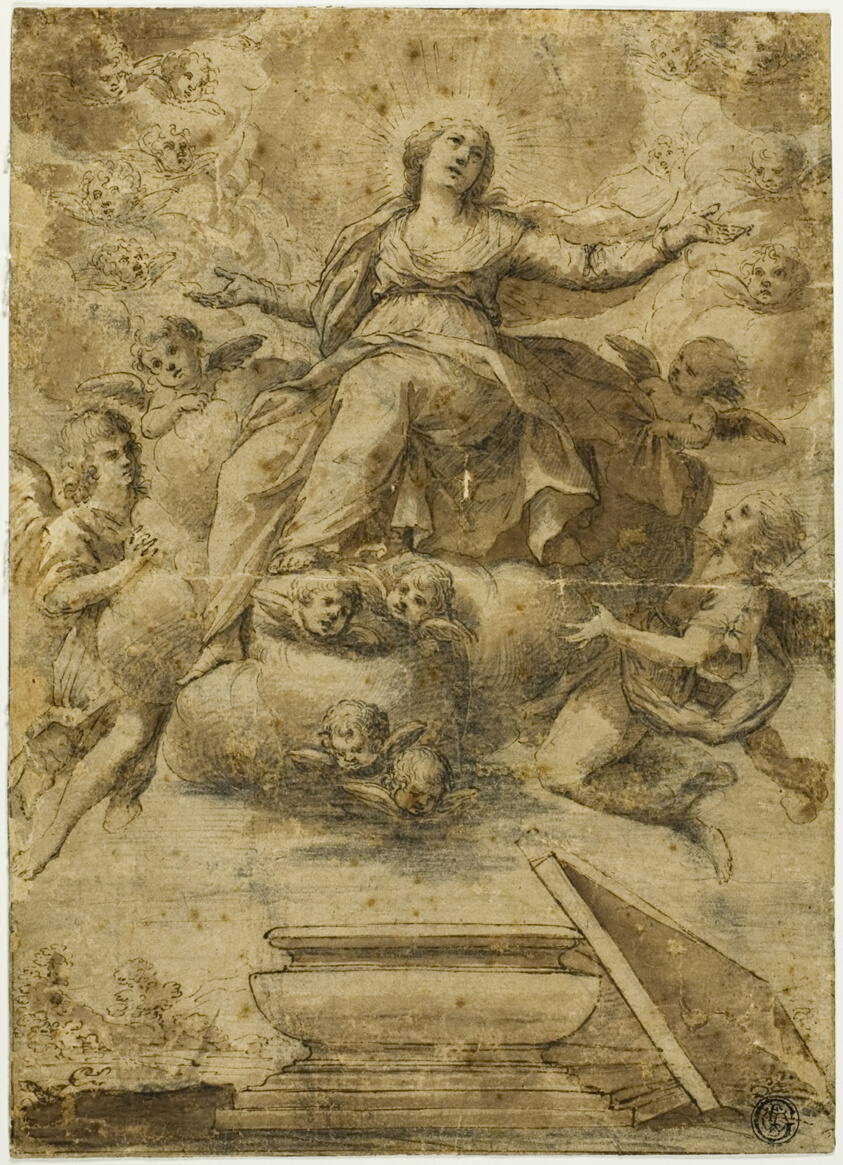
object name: Drawing and Watercolor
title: Assumption of the Virgin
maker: School of Carlo Maratti; Italian, 1612-1666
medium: Pen and brown ink, with brush and brown wash and black chalk, on ivory laid paper, laid down on ivory laid paper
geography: Italy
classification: ink or chalk wash; drawings (visual works); prints and drawing